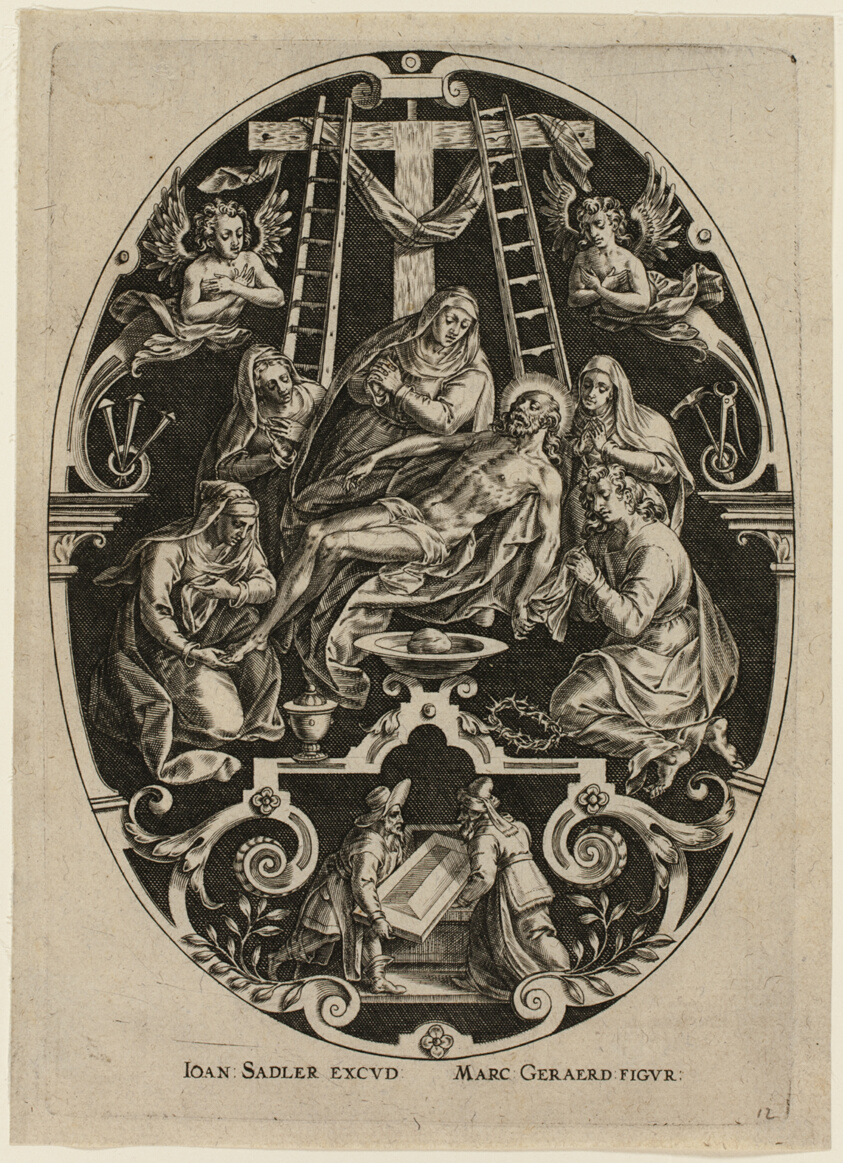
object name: Print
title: Lamentation, from Passion of Christ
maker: Jan Sadeler, the Elder (Flemish, 1550-1600); after Marcus Gheeraerts, the Elder (Flemish, c. 1520-c. 1590)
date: 1575/1600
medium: Engraving in black on cream laid paper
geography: Flanders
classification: engraving; print; prints and drawing